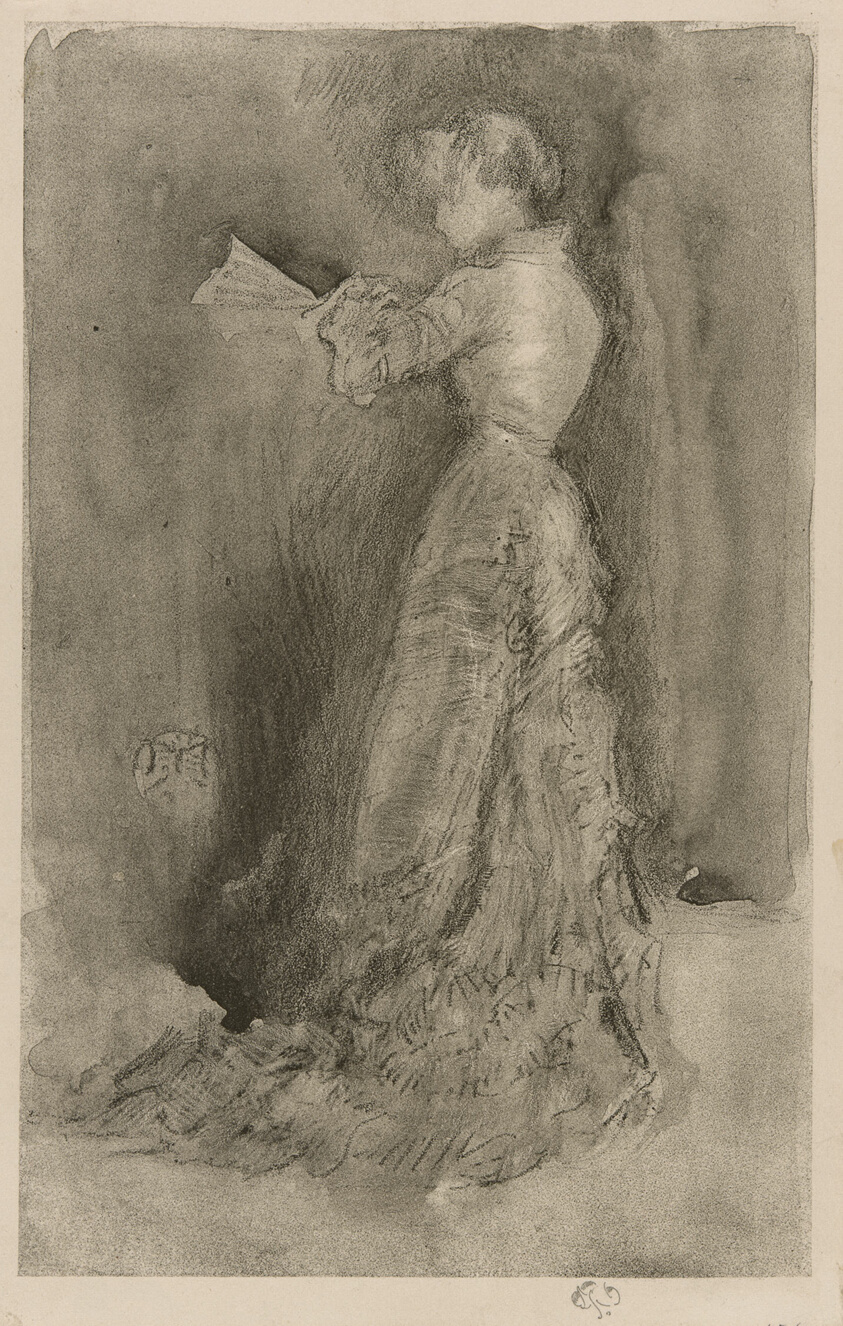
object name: Print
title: The Toilet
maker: James McNeill Whistler (American, 1834-1903)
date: 1878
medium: Lithotint with scraping and incising, on a prepared half-tint ground, in black on cream wove paper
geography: United States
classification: lithotint; lithograph; print; prints and drawing; paper